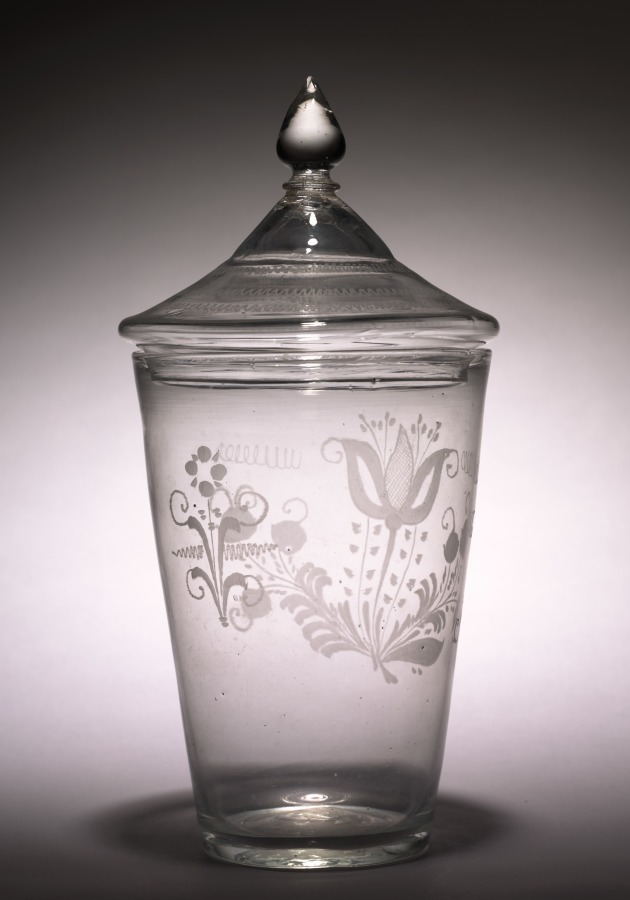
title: Flip Glass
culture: America, late 18th century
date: late 1700s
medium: glass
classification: Glass